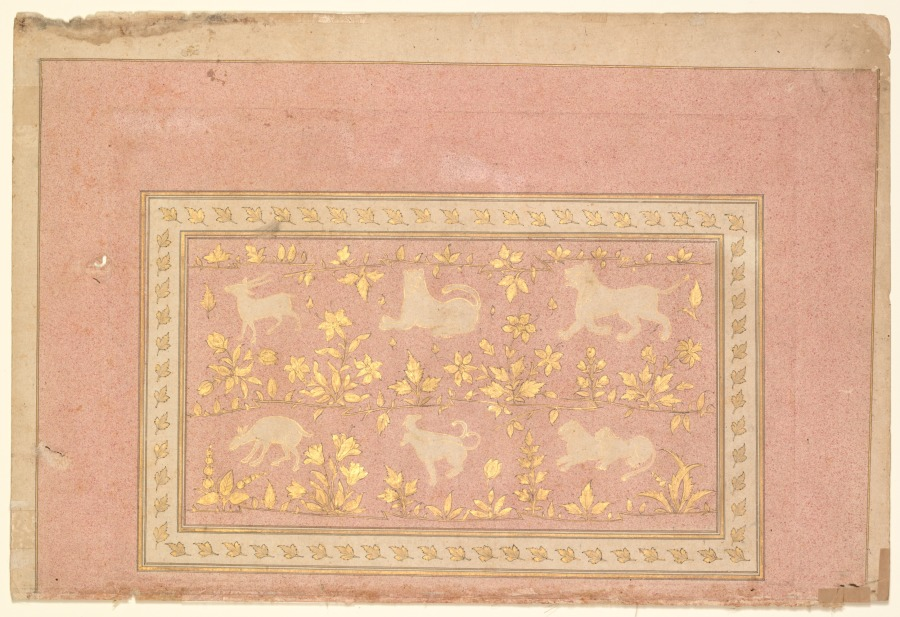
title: Stenciled Scenes of Lion and Gazelle (verso)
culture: Mughal India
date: c. 1710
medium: Gum tempera, ink, and gold on paper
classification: Painting